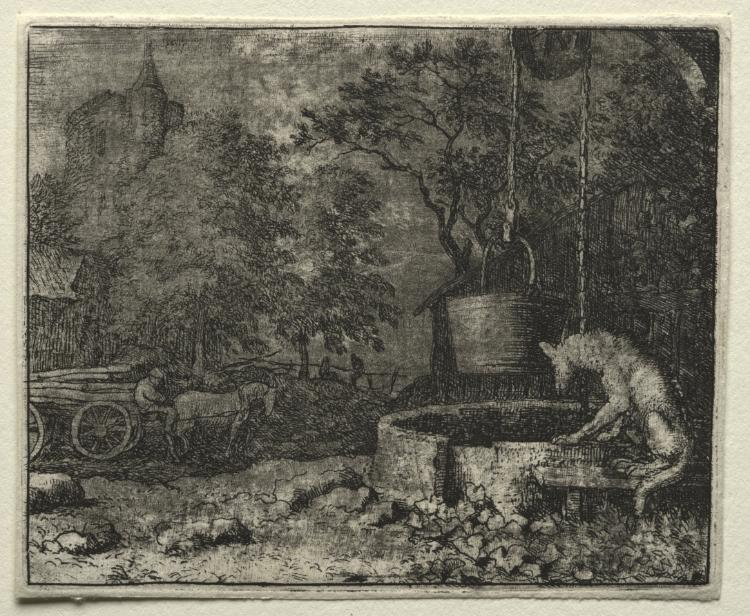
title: Reynard the Fox: Reynard Tricks the Wife of the Wolf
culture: Netherlands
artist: Allart van Everdingen (Dutch, 1621–1675)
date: 1650–75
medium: etching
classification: Print